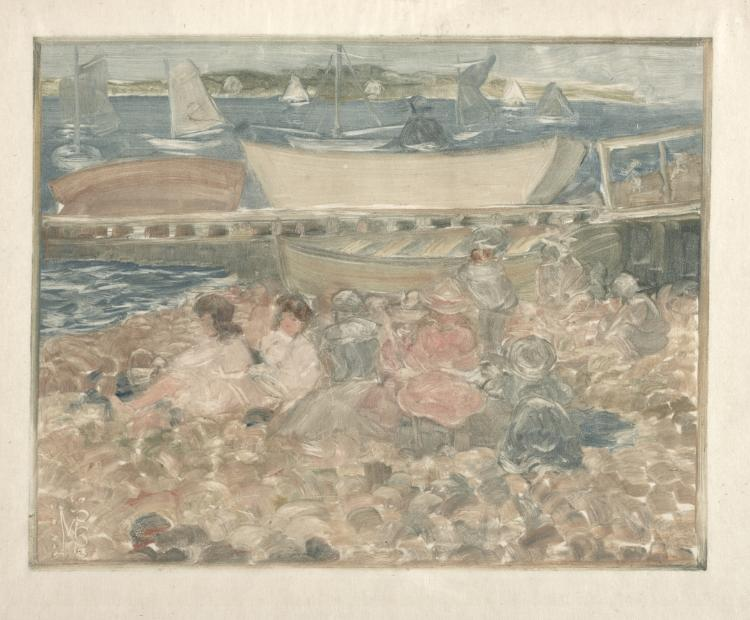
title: Shipyard: Children Playing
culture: America, early 20th Century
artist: Maurice Prendergast (American, born Newfoundland [now Canada], 1858–1924)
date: 1900–1902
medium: color monotype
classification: Print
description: In 1891, Maurice Prendergast left Boston for Paris, where he studied art for three years at the Atelier Colarossi and the Académie Julian. It was probably in France that he learned the technique of monotype, a medium that he used throughout the second half of the 1890s. This delicate view of children on a beach—possibly Saint-Malo in France—reflects the influence of James Abbott McNeill Whistler.